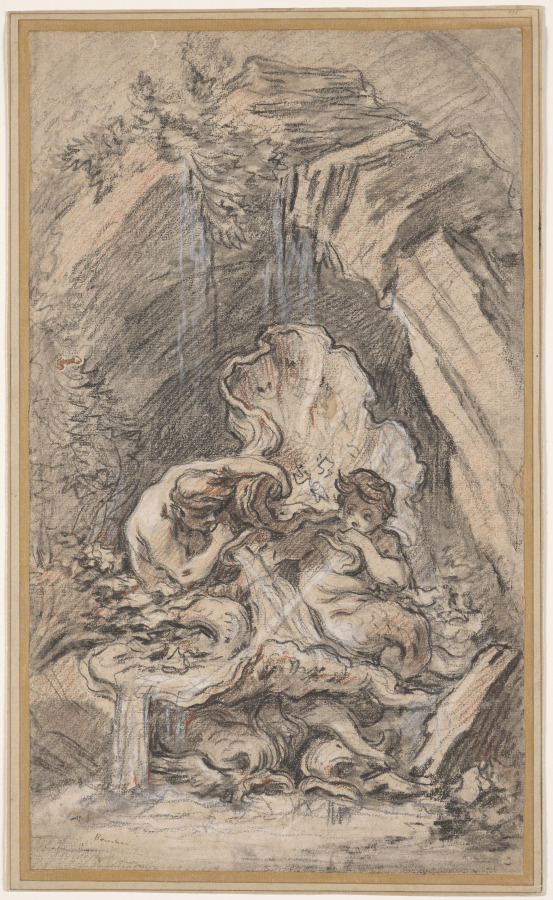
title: Fountain with Two Tritons Blowing Conch Shells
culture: France, 18th century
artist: François Boucher (French, 1703–1770)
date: c. 1736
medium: Black chalk with stumping, and red chalk, heightened with white chalk on beige laid paper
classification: Drawing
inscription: lower left, in brown ink: Boucher; secondary support, in graphite: [195?]; verso of secondary support, upper center, in brown ink: M / No. 53; center, in graphite: B / [illegible]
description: In this early chalk drawing, François Boucher combined plants, dolphins, rocks, shells, and tritons (mythological creatures that are part man and part fish) into a design that was meant to suggest a fountain in a rocky garden grotto. This sheet represents l'art rocaille, or "rock and shell art," a style of ornament that developed in France during the 1730s and featured decorative compositions with abundant detail. The image was one of seven that the printmaker Gabriel Huquier translated as etchings around the time Boucher completed them. These reproductions helped to bring Boucher's work to a broader audience, including other artists who emulated his style.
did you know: While translating this drawing into etching, the printmaker Gabriel Huquier replaced Boucher's grotto setting with an architectural niche.